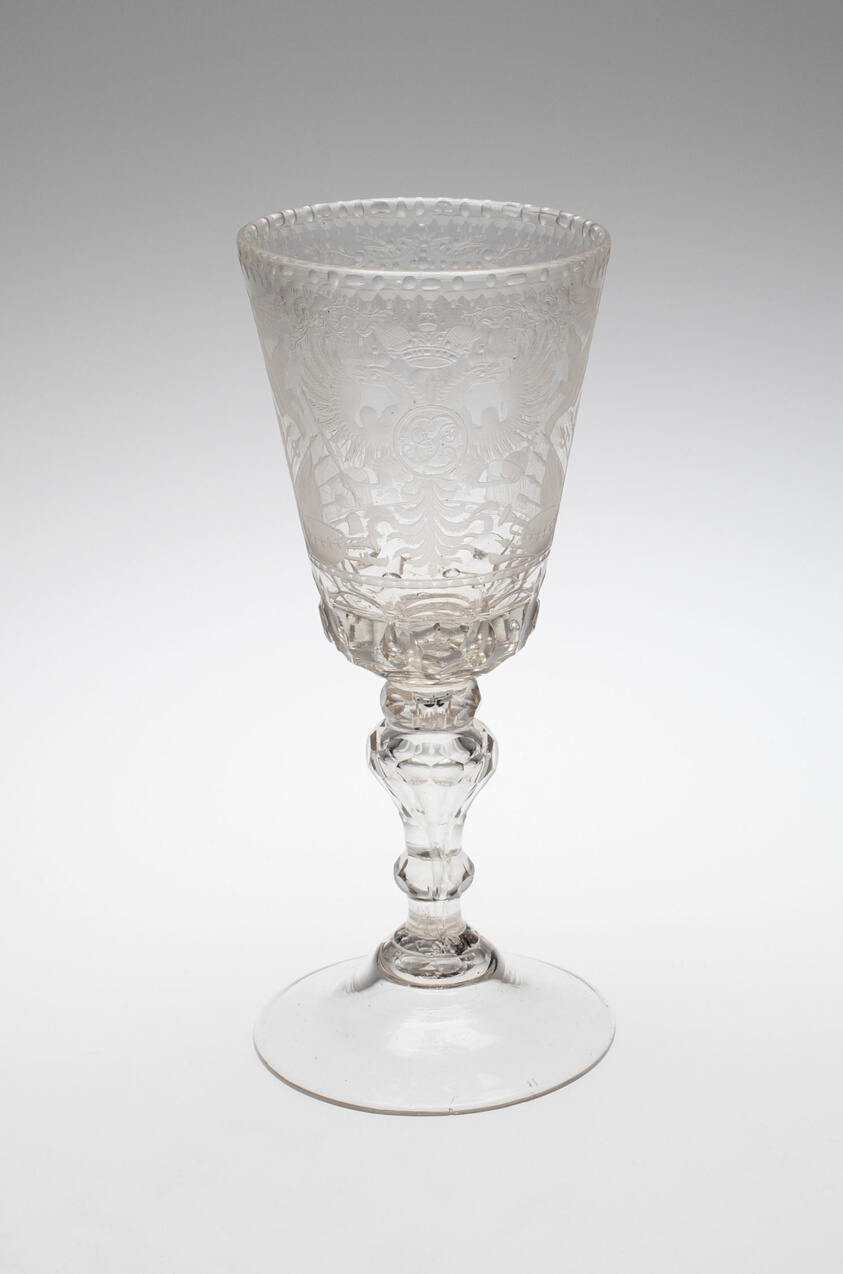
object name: Glass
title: Goblet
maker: St Petersburg Glass Factory; Russian, 1738-1917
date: c. 1760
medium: Blown and cut glass with engraved decoration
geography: Russia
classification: drinking vessel; glass; european decorative arts